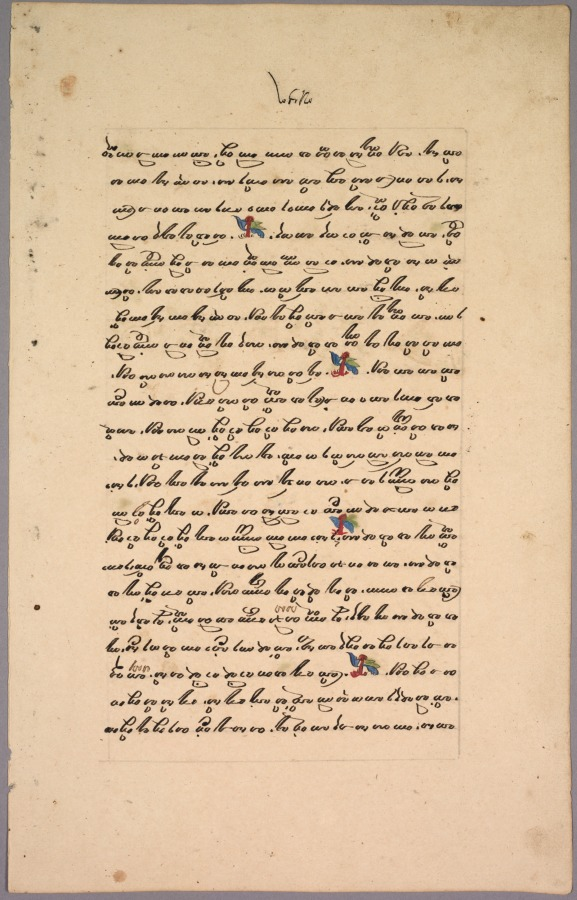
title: Page from Ramayana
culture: Java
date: 1800s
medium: ink on paper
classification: Manuscript